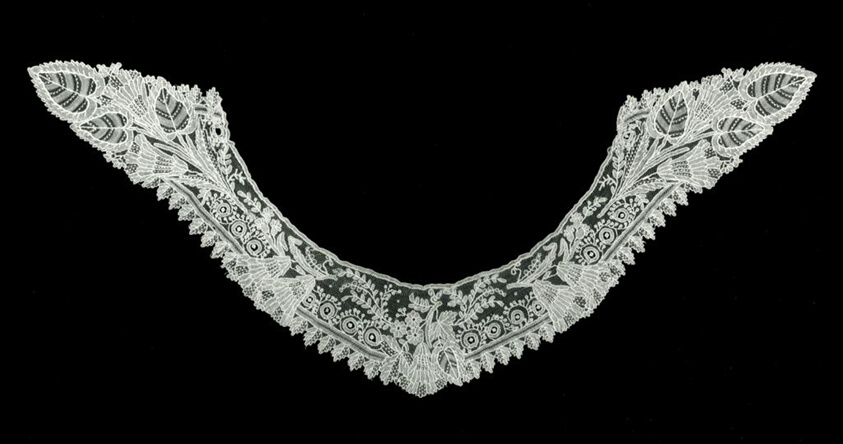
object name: Textile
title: Collar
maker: Belgium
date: 1860s/80s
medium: Cotton, needle lace of a type known as "Point de Gaze"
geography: Belgium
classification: textile; lace - needle